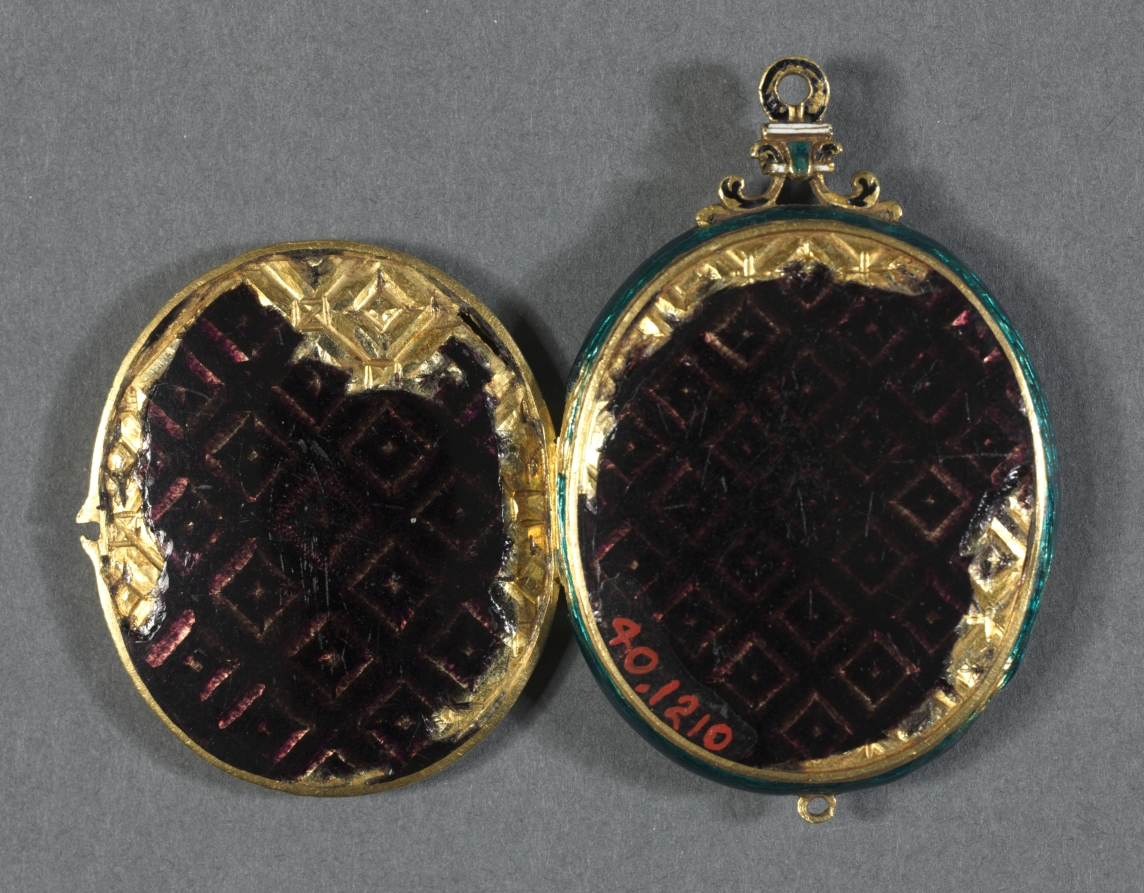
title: Portrait of a Woman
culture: England, 16th century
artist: Nicholas Hilliard (English, c. 1547–1619)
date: c. 1593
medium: watercolor on vellum in a gold and enamel locket frame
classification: Portrait Miniature